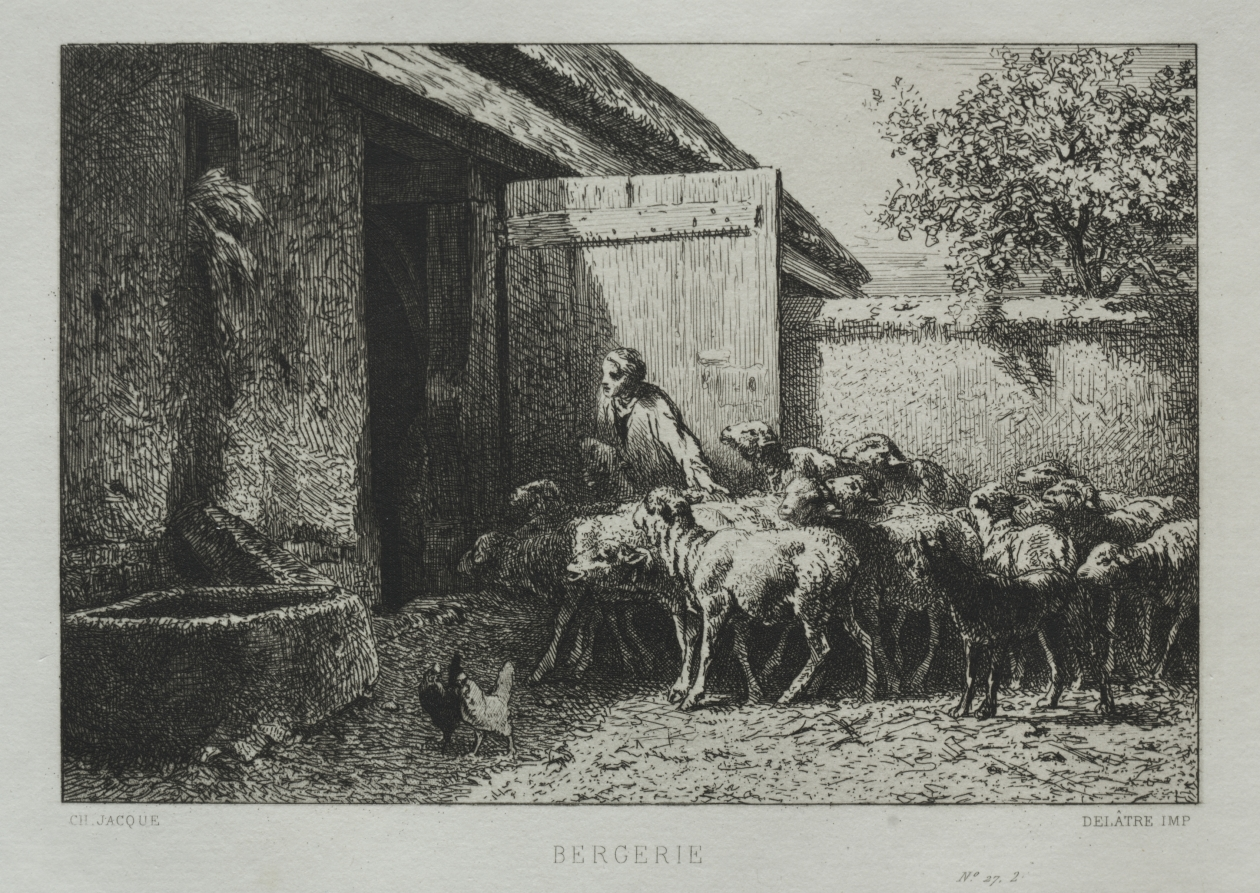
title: Sheepfold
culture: France, 19th century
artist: Charles-Émile Jacque (French, 1813–1894)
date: 1865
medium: etching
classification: Print